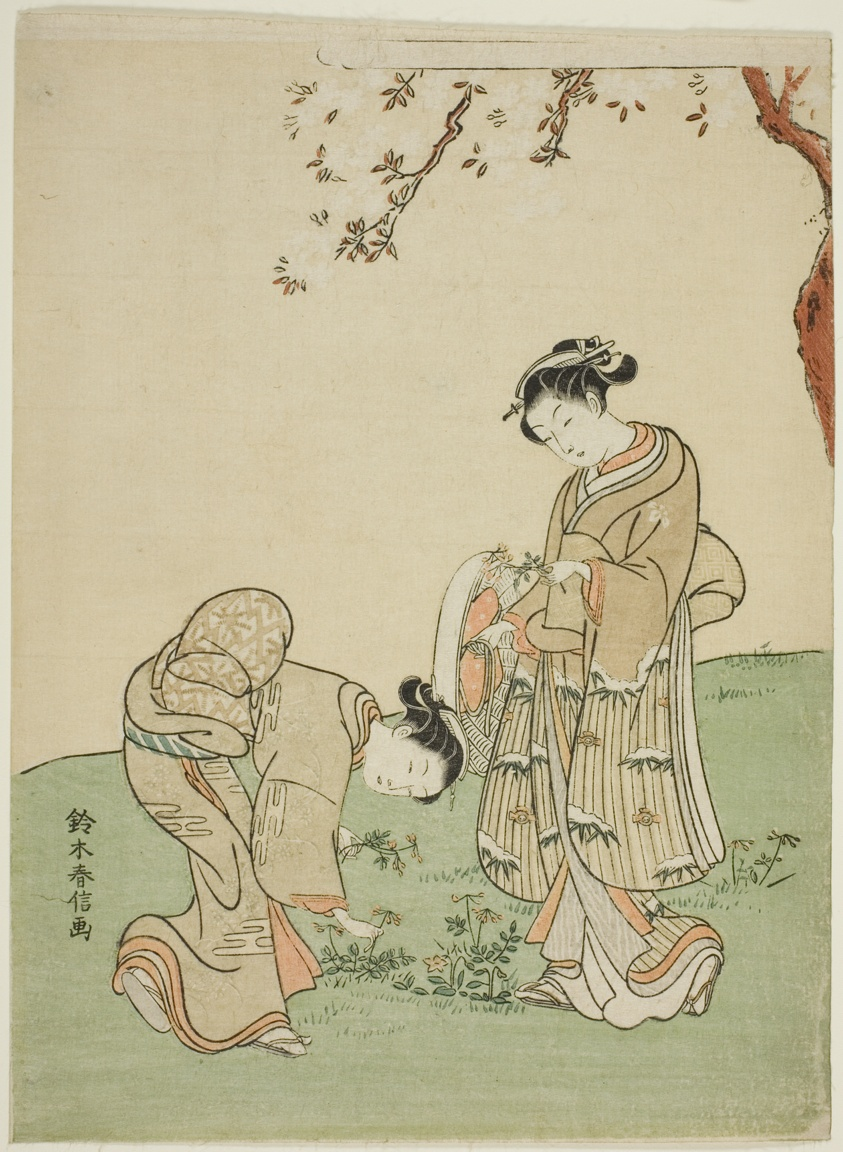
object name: Print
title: Gathering Spring Flowers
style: Japanese (culture or style)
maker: Suzuki Harunobu 鈴木 春信; Japanese, 1725 (?)-1770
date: c. 1767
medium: Color woodblock print; chuban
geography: Japan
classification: woodblock print; print; asian art